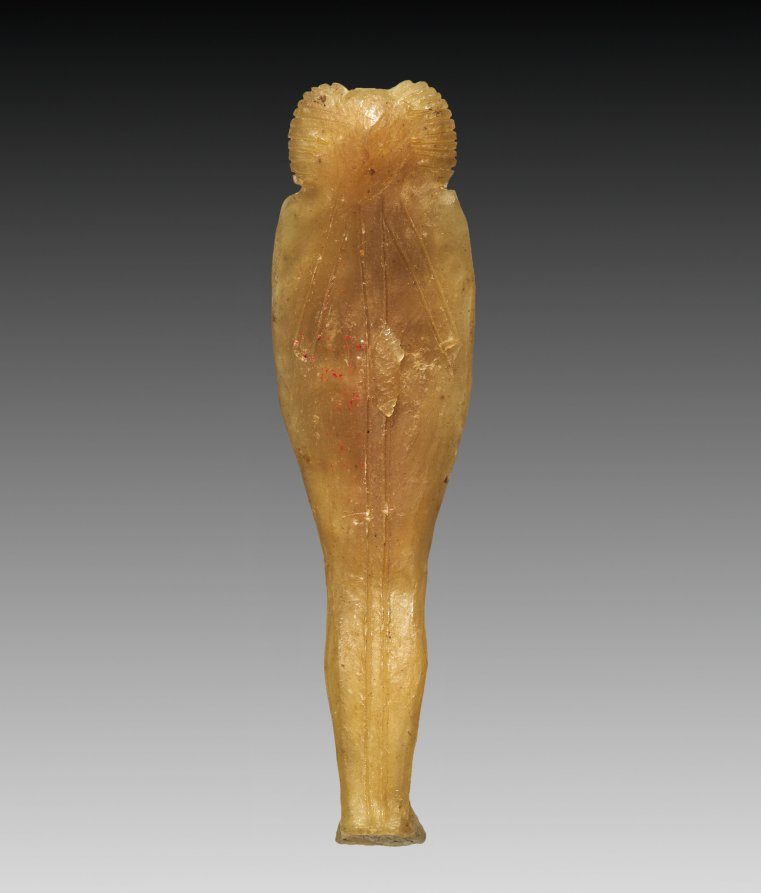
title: Son of Horus: Hapy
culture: Egypt, Third Intermediate (1069–715 BCE), Dynasties 21–22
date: 1000–900 BCE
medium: honey-colored wax with dark amber varnish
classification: Funerary Equipment